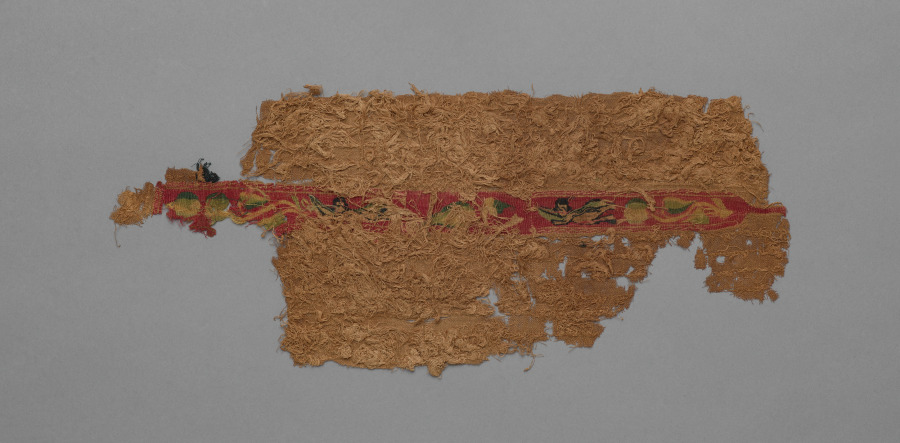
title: Fragment from a Tunic: Clavi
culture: Egypt, Umayyad period (661–750)?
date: 600s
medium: tabby weave, inwoven tapestry ornament; wool and linen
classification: Textile